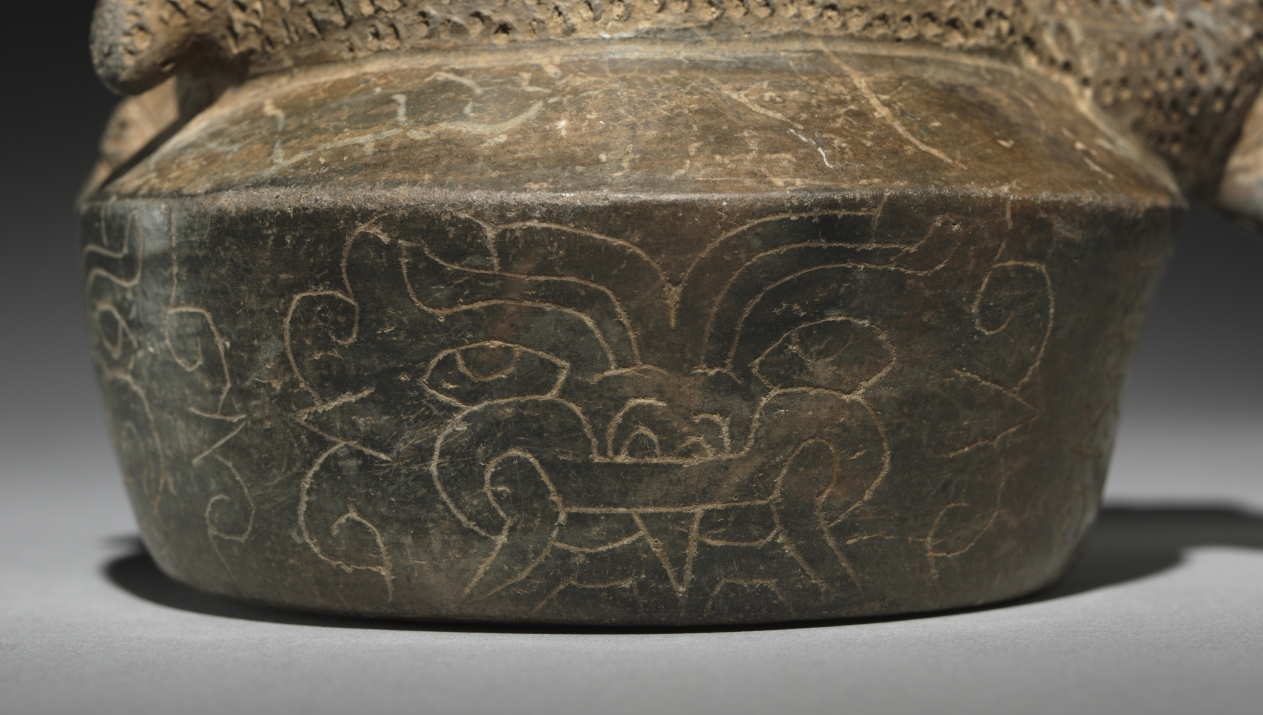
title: Vessel with Pudu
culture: Central Andes, North Coast, Chongoyape, Formative period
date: 500–200 BCE (thermoluminescence date, 1190–90 BCE)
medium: ceramic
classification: Ceramic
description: This bound pudu—a small reddish deer indigenous to the Andes—lies atop a chamber with fanged supernatural heads incised on the sides. The animal may represent a sacrificial offering.